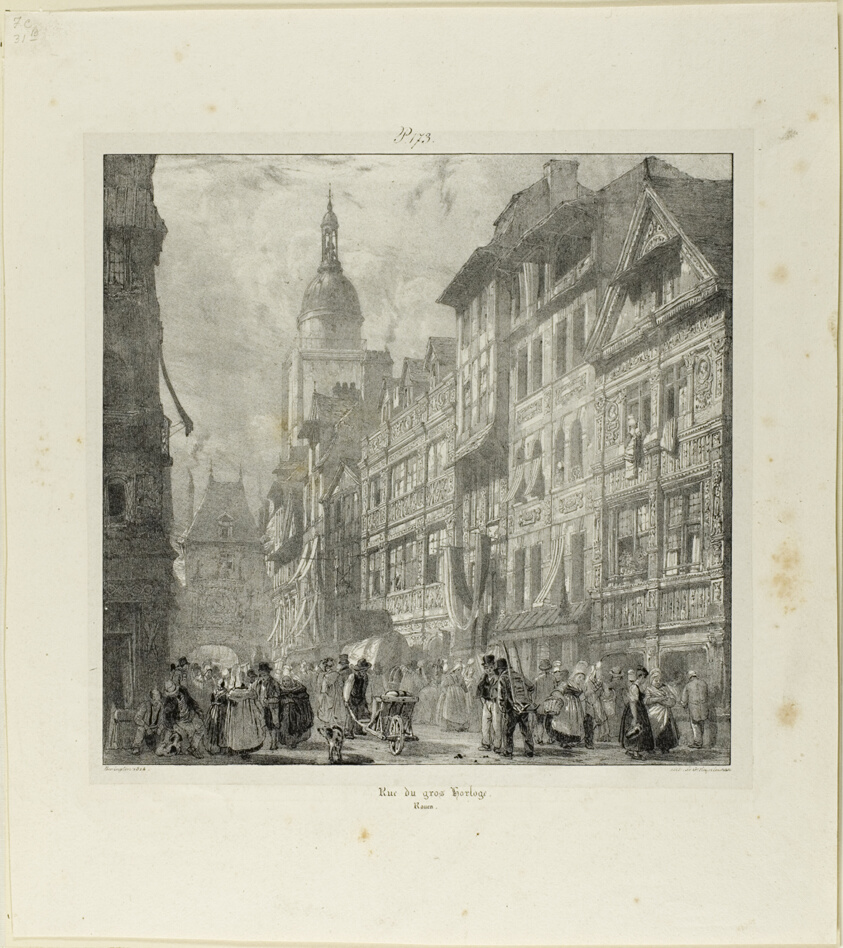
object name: Print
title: Rue du Gros Horloge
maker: Richard Parkes Bonington (English, 1802-1828)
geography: England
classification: lithograph; print; prints and drawing